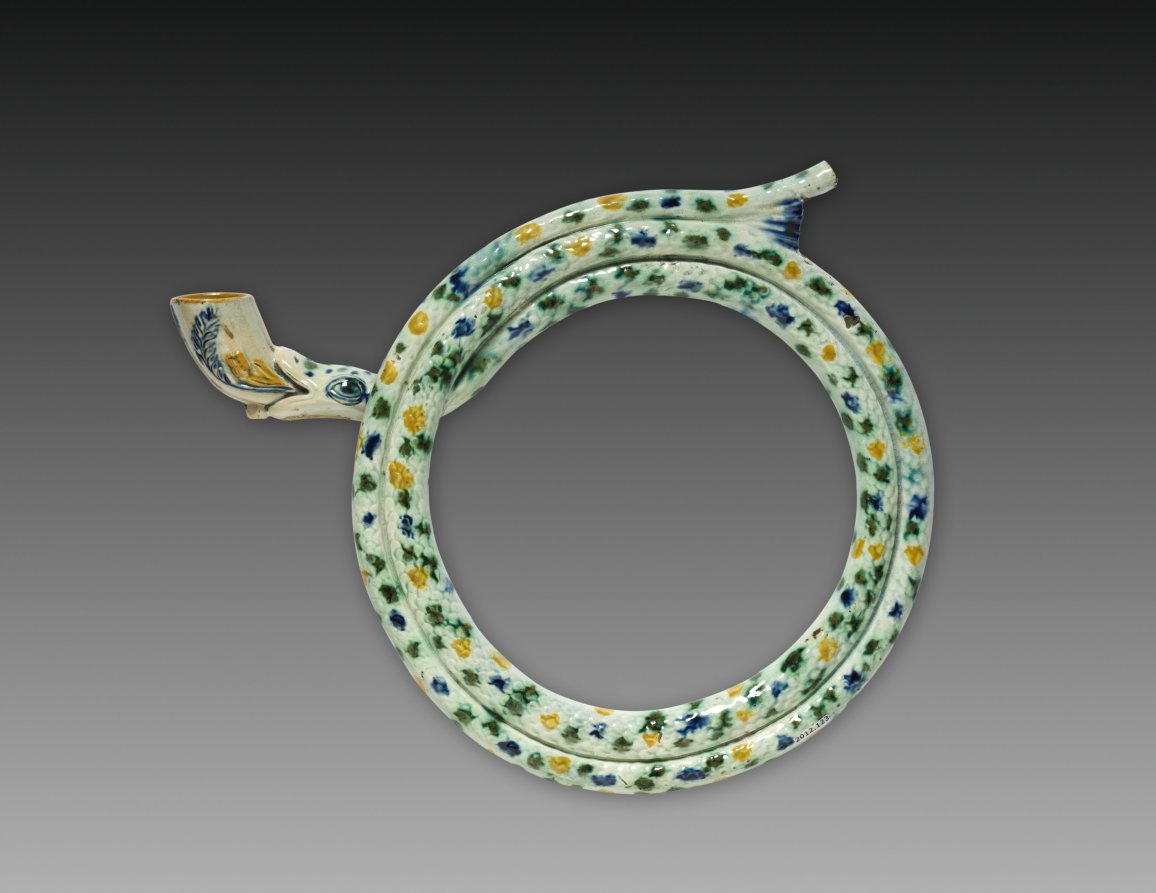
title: Pipe in the Form of a Coiled Snake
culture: England, Staffordshire, late 18th-early 19th Century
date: 1780–1820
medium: lead-glazed earthenware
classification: Ceramic